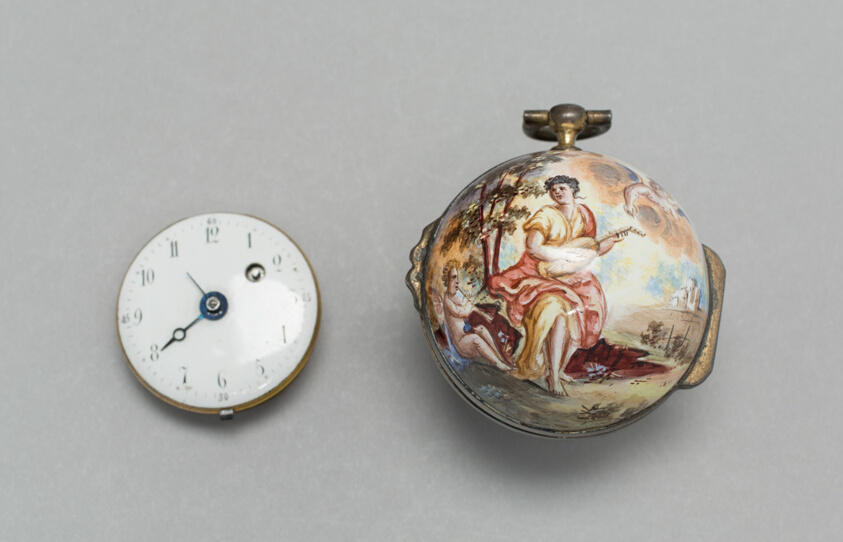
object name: Metalwork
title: Watch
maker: Vienna, Austria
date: Mid 19th century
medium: Enameled metal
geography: Austria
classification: watch; european decorative arts; metalwork